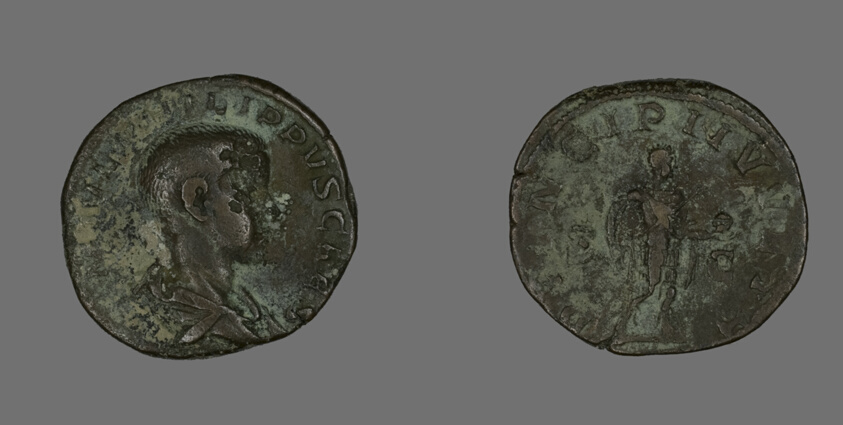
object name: Coin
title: Sestertius (Coin) Portraying King Philip II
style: roman (ancient, style or period)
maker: Roman, minted in Rome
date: 244-246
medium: Bronze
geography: Roman Empire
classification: coin; ancient art